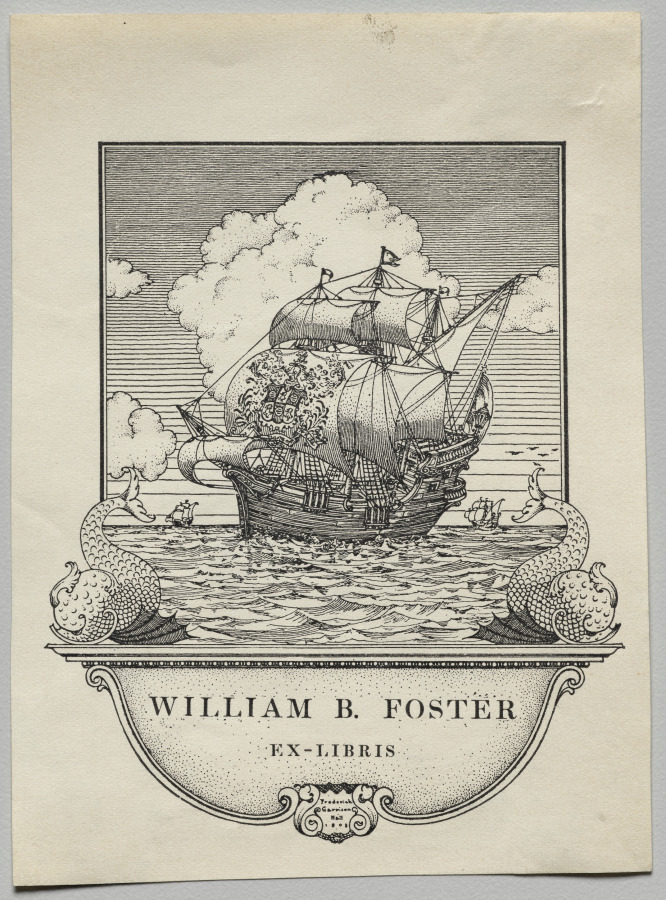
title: Bookplate: William B. Foster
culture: America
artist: Frederick Garrison Hall (American, 1879–1946)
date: 1905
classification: Print